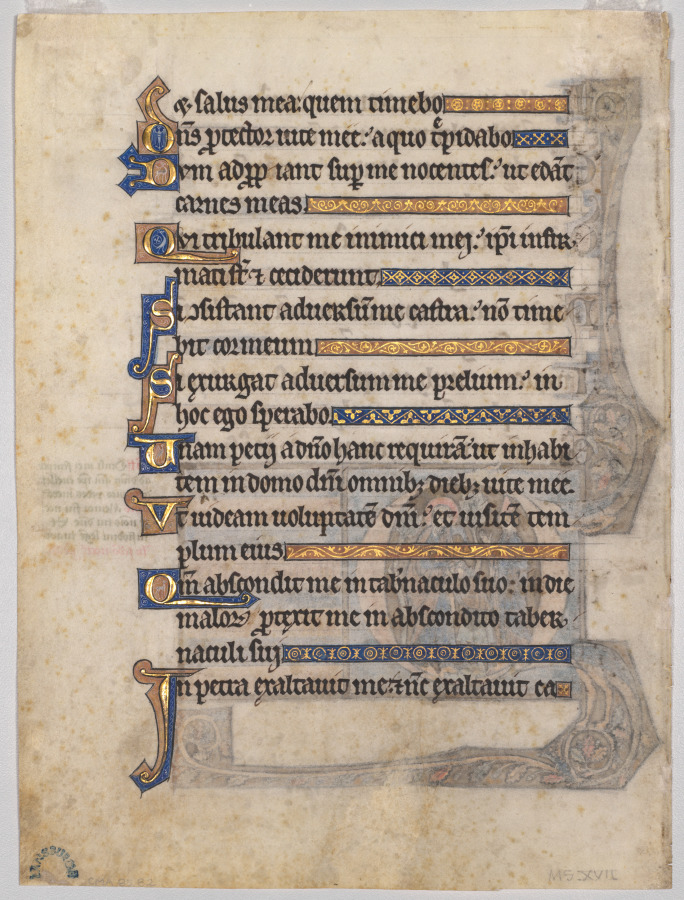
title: Single Leaf Excised from a Psalter: Initial D[ominus illuminatio mea] with Samuel Anointing David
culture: Northeastern France, 13th century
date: c. 1270–1290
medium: ink, tempera, and gold on vellum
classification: Manuscript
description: This historiated initial serves as a visual lead to Psalm 26, which begins with the last two lines of the page: Dominus illuminatio mea (The Lord is my light). By setting the body of the initial against a blue diapered (patterned) background for chromatic effect, the artist observed the latest fashion in book illumination.